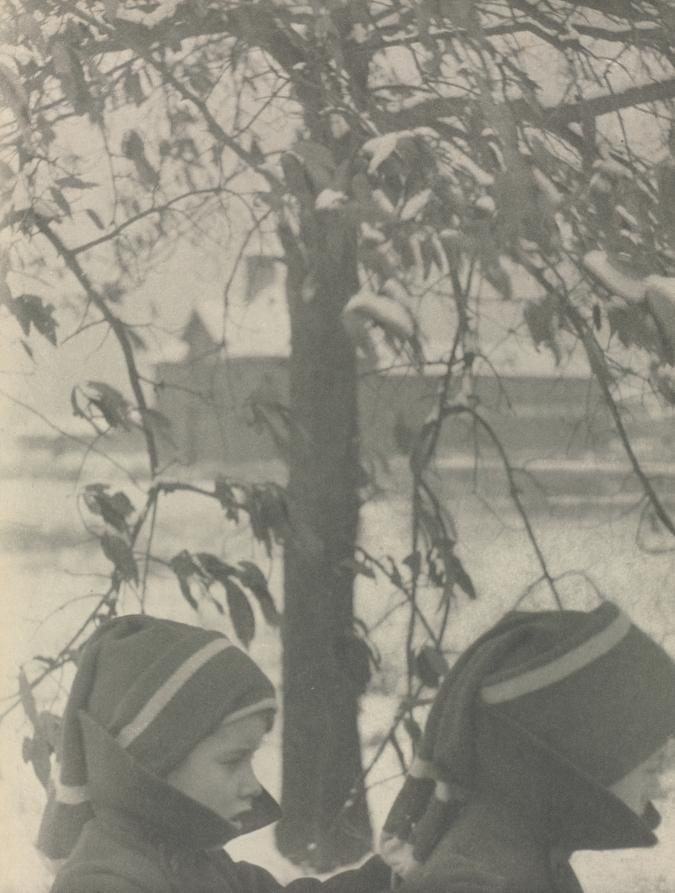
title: Camera Work: Boys Going to School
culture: America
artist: Clarence H. White (American, 1871–1925)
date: 1908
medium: photogravure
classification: Bound Volume